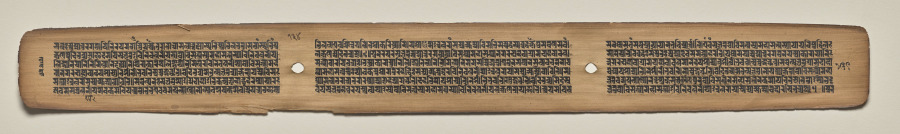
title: Text, Folio 134 (verso), from a Manuscript of the Perfection of Wisdom in Eight Thousand Lines (Ashtasahasrika Prajnaparamita-sutra)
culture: Eastern India, Bihar, Vikramashila Monastery. Painting: Nepal, Kathmandu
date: Sunday, September 14, 1119 (year 239 of the Newar Samvat in the month of Ashvina)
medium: gum tempera and ink on palm leaves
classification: Painting